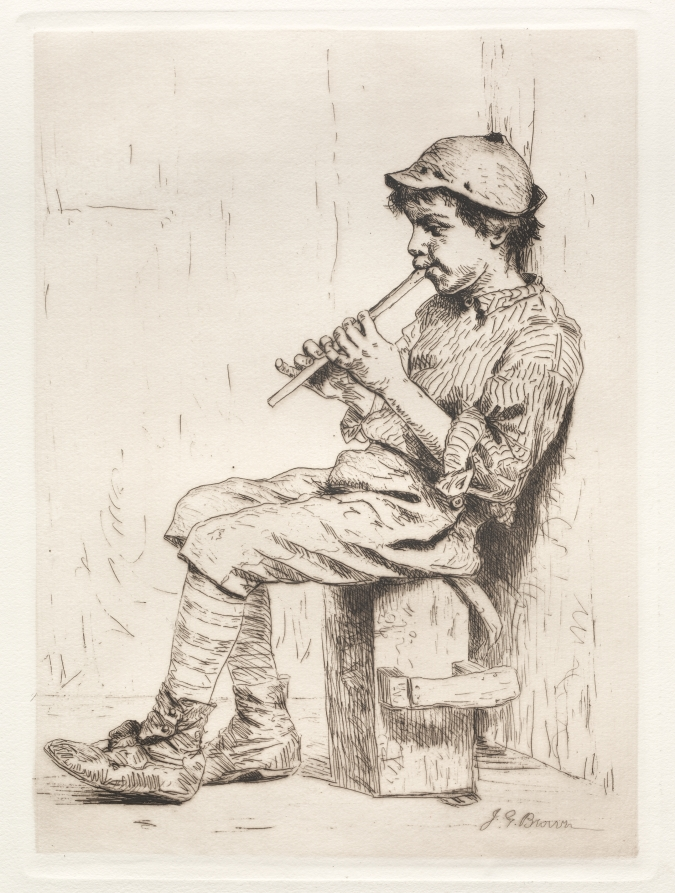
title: Business Neglected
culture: America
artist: John George Brown (American, born England, 1831–1913)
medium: etching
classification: Print